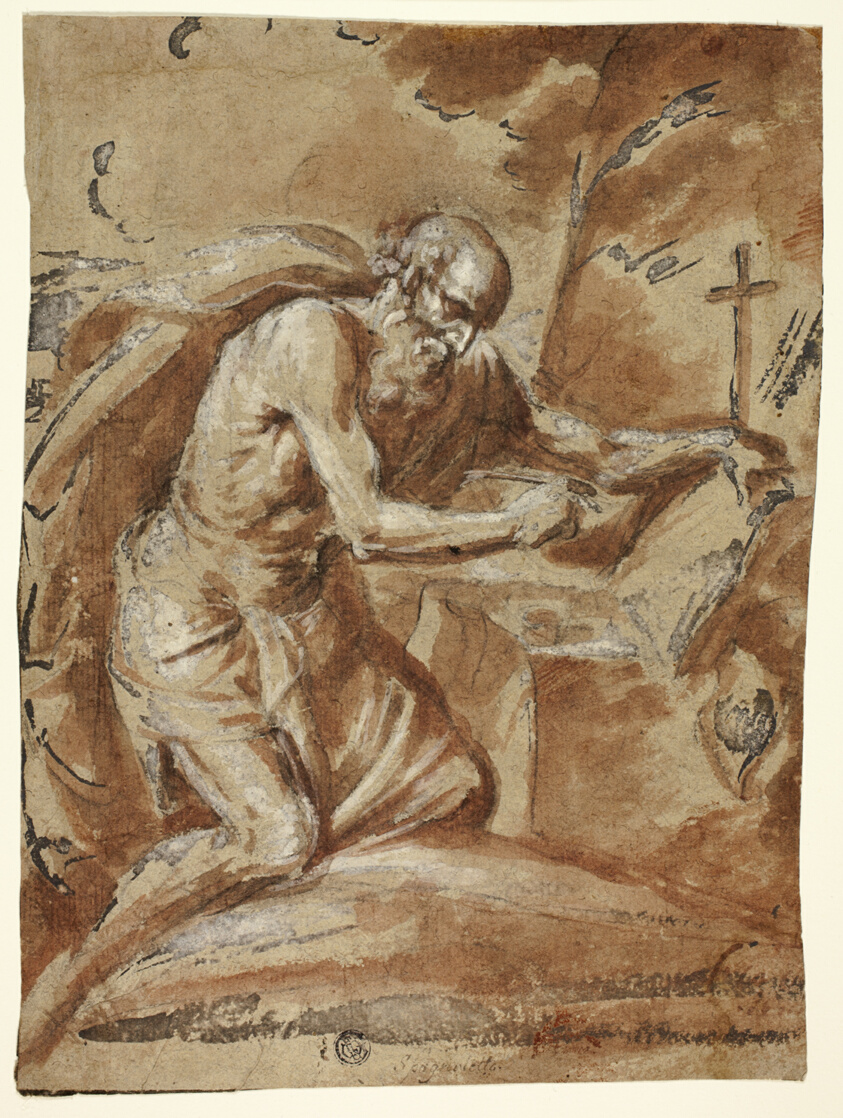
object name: Drawing and Watercolor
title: Saint Jerome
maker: Attributed to Jusepe de Ribera; Spanish, 1588-1652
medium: Brush and brown wash heightened with lead white (discolored) over black chalk, on tan laid paper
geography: Spain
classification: ink or chalk wash; drawings (visual works); prints and drawing